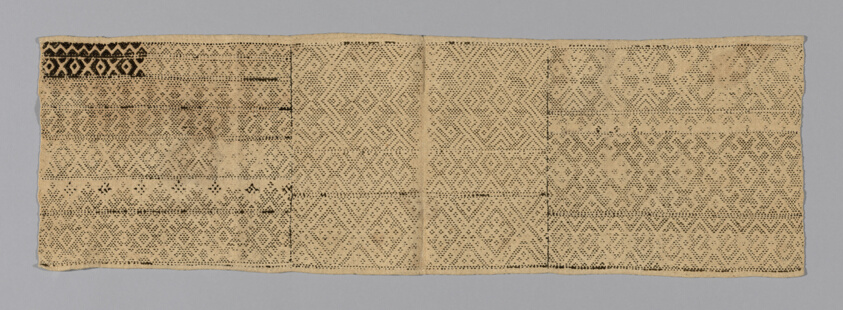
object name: Textile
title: Sampler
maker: Spain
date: 19th century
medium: Linen, plain weave; emboidered with linen yarns in back, chain, double knot, and running stitches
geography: Spain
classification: textile; needlework (visual works); sampler